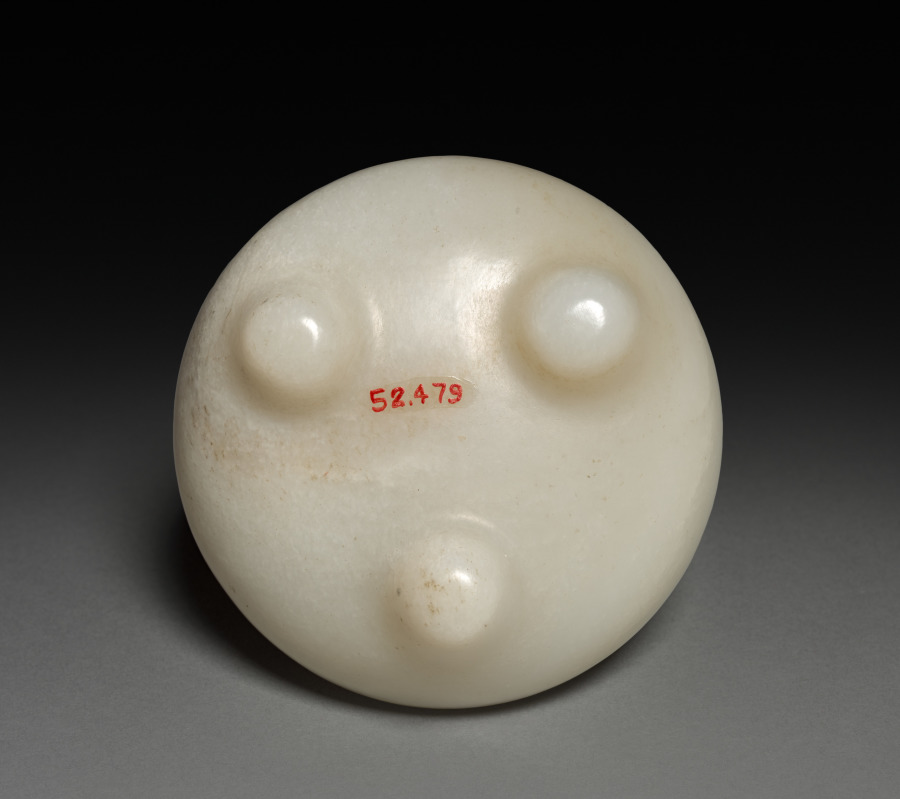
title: Tripod Incense Burner, Ding Shape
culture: China, Qing dynasty (1644-1911)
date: 1644–1911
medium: jade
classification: Jade